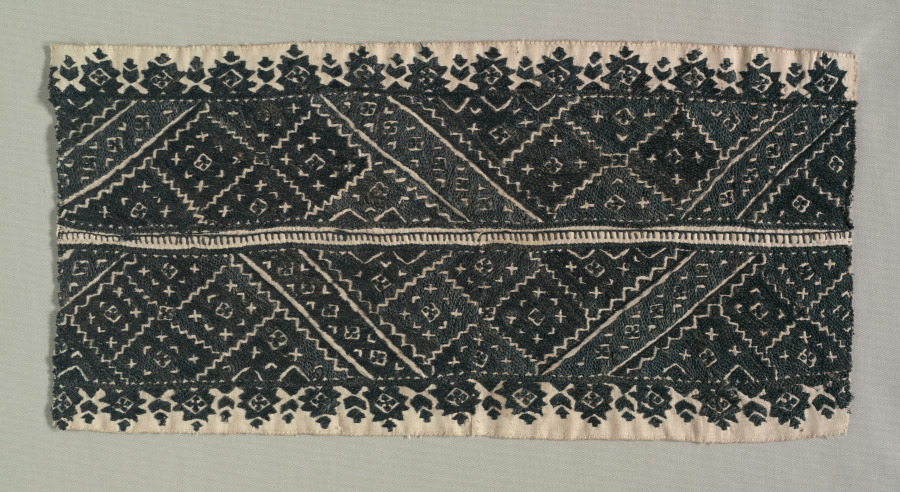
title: Fragment of a furnishing textile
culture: Africa, North Africa, Morocco, Fes, Moroccan embroiderer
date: 1800s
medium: Cotton, silk, dye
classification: Embroidery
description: The dense blue embroidery on this fragment is associated with the city of Fes, and was likely part of a larger textile used to decorate the interior of a Moroccan home. It might have been used as a cover for a pillow or low sofas lining the walls of a sitting room. Historically, some of these textiles were described as "Aleuj" (a pejorative term loosely translating to 'convert') and thought to be made by Circassian women from the Caucasus region in western Asia.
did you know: This textile was purchased in 1933 from the "A Century of Progress International Exposition," better known as the Chicago World's Fair.